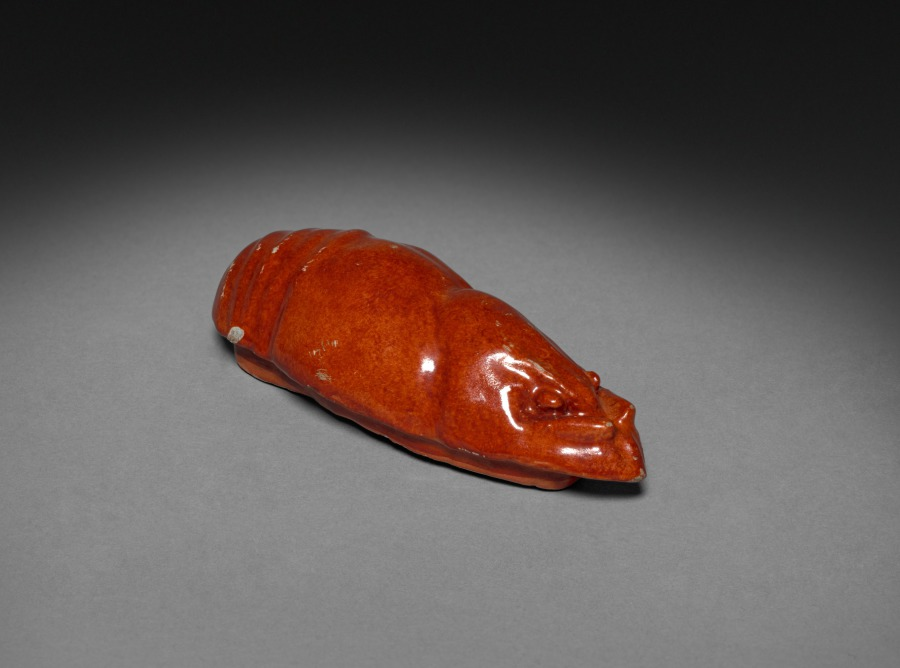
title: Plate with Crayfish (lid)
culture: France, Strasbourg, 18th century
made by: possibly by Strasbourg Factory (France)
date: 1750–1775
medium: faience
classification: Ceramic